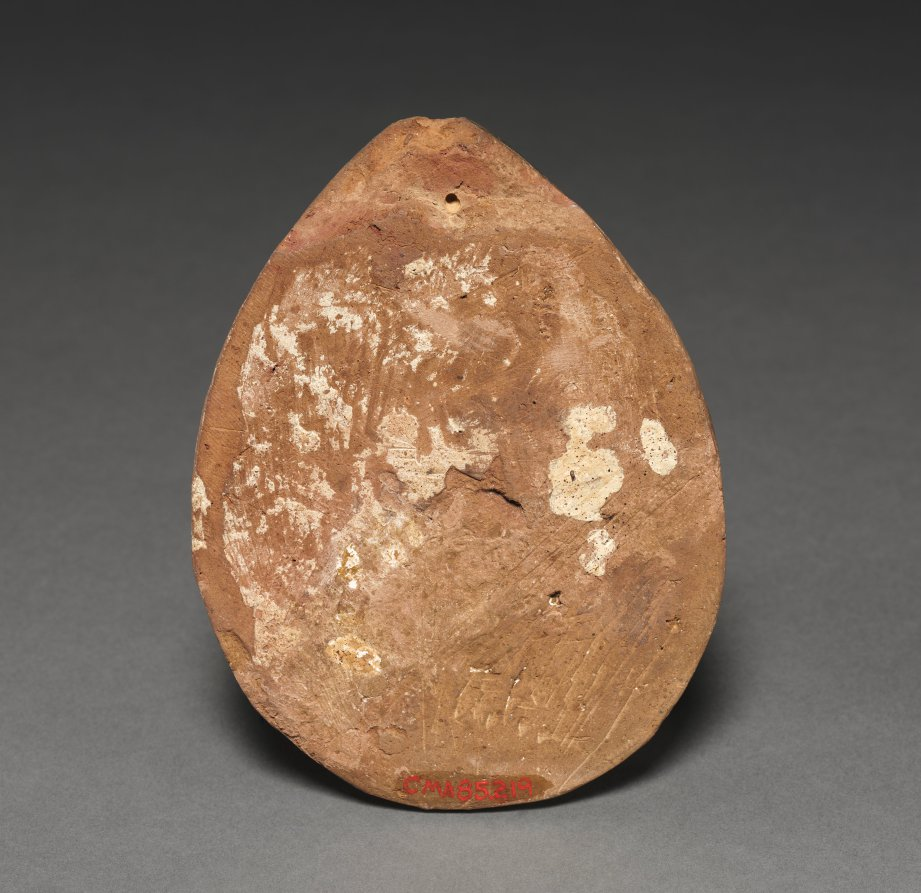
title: Votive Plaque with Figure of the Buddha, Temple at Bodhgaya, and Stupas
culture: India, Bihar, Bodhgaya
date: 800s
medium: terracotta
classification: Sculpture